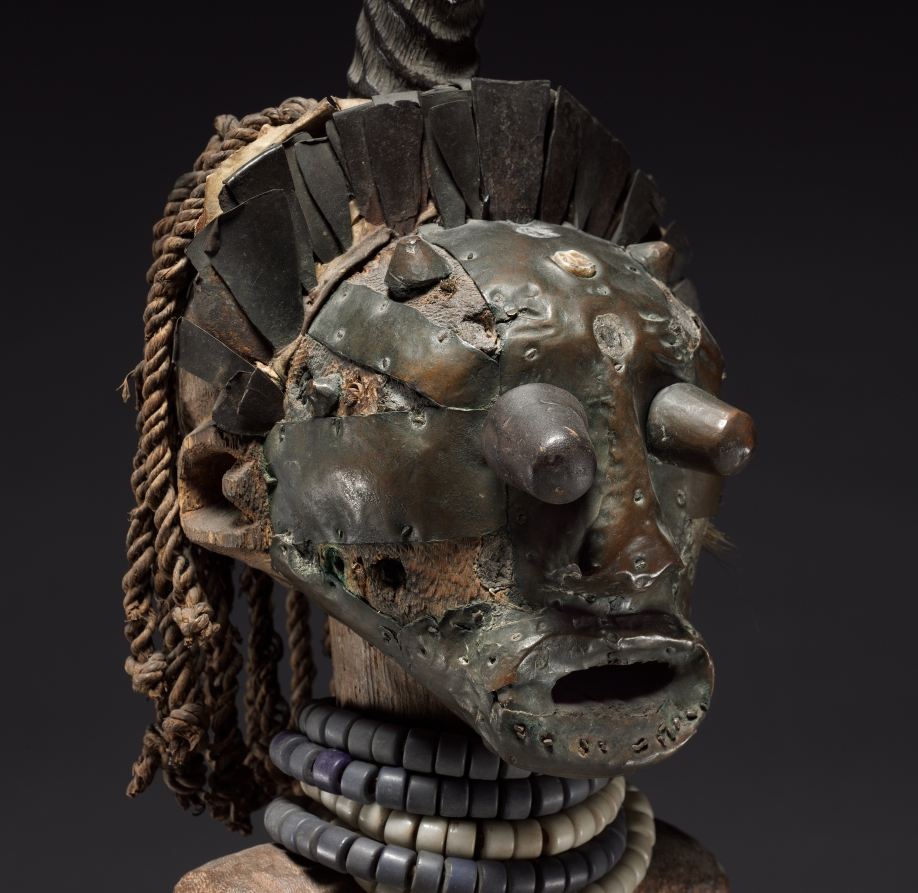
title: Male Figure (nkishi)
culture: Africa, Central Africa, Democratic Republic of Congo, Songye-style carver and nganga (priest)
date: late 1800s–early 1900s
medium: Wood, glass beads, brass (including upholstery studs), copper alloy, iron alloy, raffia, reedbuck antelope horn, rawhide, animal hair, human teeth, organic material, minerals, and plant fibers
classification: Sculpture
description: This figure's visual impact and workmanship suggest that an extended family––rather than an individual––used it. The raffia skirt around the waist and the blue and white beads are indicators of leadership. The metal appliqué covering the face and the metal blades that hedge the headgear refer to the blacksmith, a culture hero celebrated in a Songye myth narrating the formation of the state. The metal strips on the skeletal face are said to relate to lightning, signaling the figure's role as a powerful anti-sorcerer, but the contrast between white iron and red copper symbolically alludes to the ambivalent powers of the figure.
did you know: Researchers conducted X-ray scanning on this figure, revealing its internal structure and human teeth, an antelope horn, and animal hair.